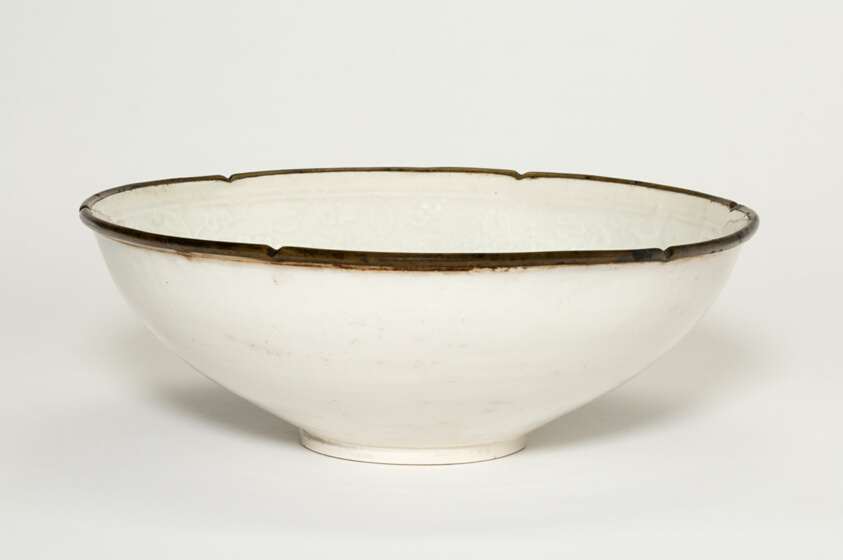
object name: Vessel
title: Bowl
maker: China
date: Song dynasty (960–1279)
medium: Bowl with rim shaped in 6 foliations and fitted with metal band. Decoration molded in relief: all-over peony flower & leaf pattern inside, band below mouth. Translucent white porcelain; bubbly glaze, thick & fluescent, white with faint bluish tinge. with rounded sides, narrow low base, rim shaped in 6 foliations and fitted with metal band. Translucent white porcelain, burned brown where exposed. Bubbly glaze, thick and fluescent, white with faint bluish tinge, covers surface except mouth rim. Decoration molded in relief: all-over peony flower and leaf pattern inside; band below mouth.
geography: China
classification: porcelain; asian art; ceramics